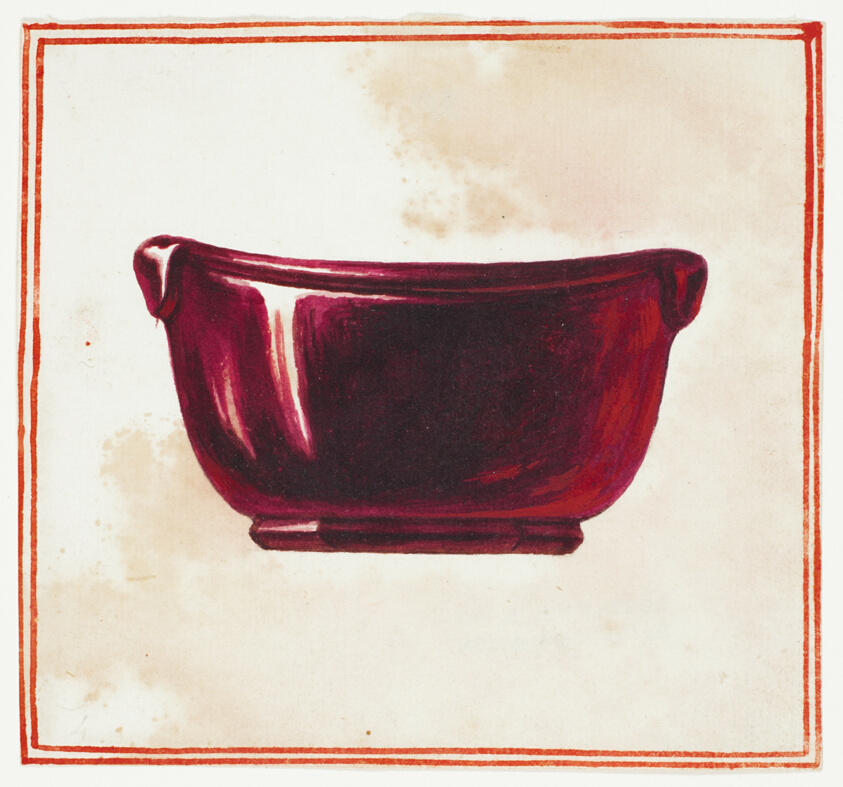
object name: Drawing and Watercolor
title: Purple Bowl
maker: Giuseppe Grisoni (Italian, born Flanders, 1699-1769)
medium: Red gouache over traces of black chalk, with glitter, on ivory laid paper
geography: Flanders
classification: gouache; drawings (visual works); prints and drawing